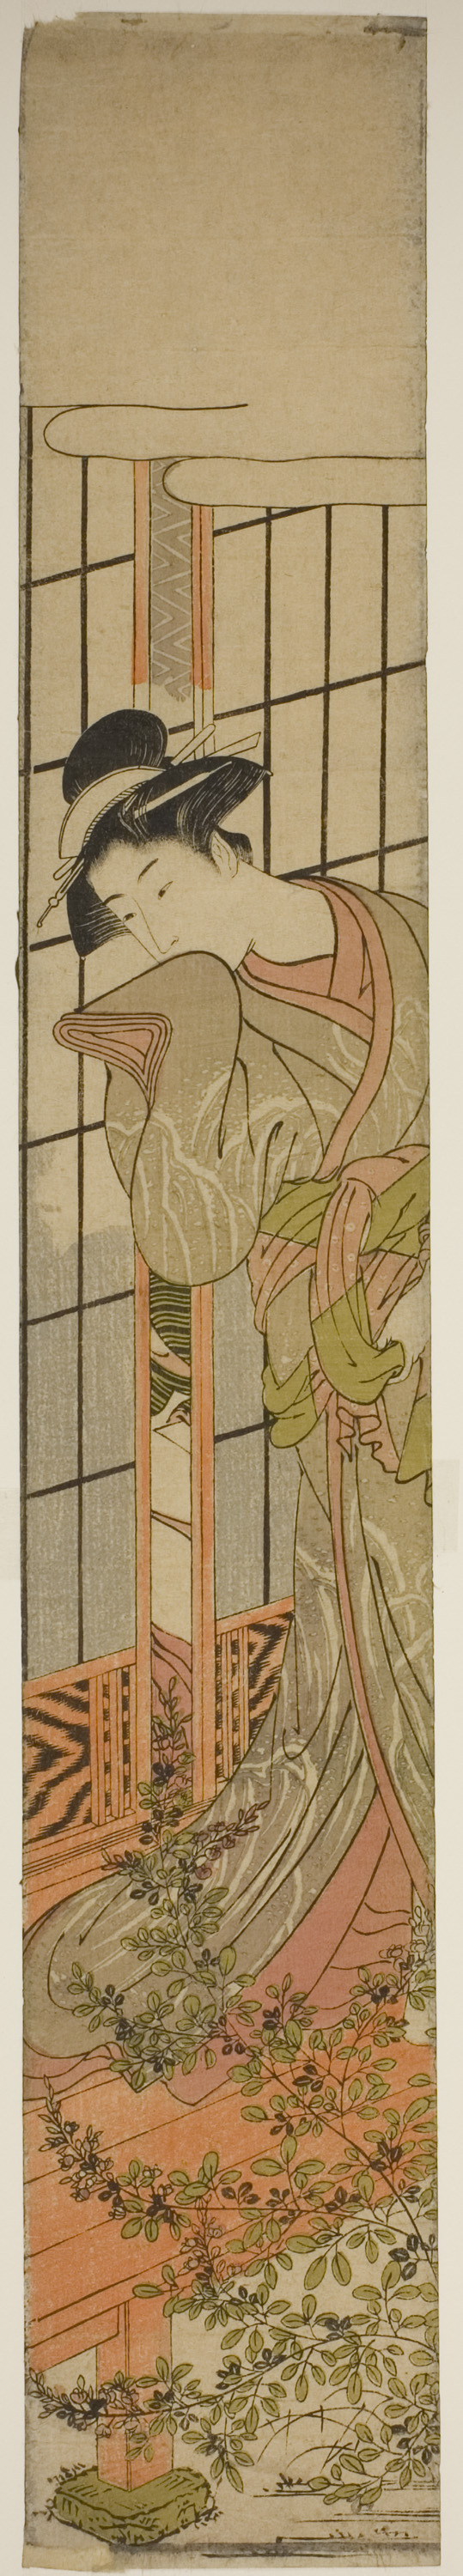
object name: Print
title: Eavesdropping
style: Japanese (culture or style)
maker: Isoda Koryusai (Japanese, 1735-1790)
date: c. 1780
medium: Color woodblock print; hashira-e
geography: Japan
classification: woodblock print; print; asian art